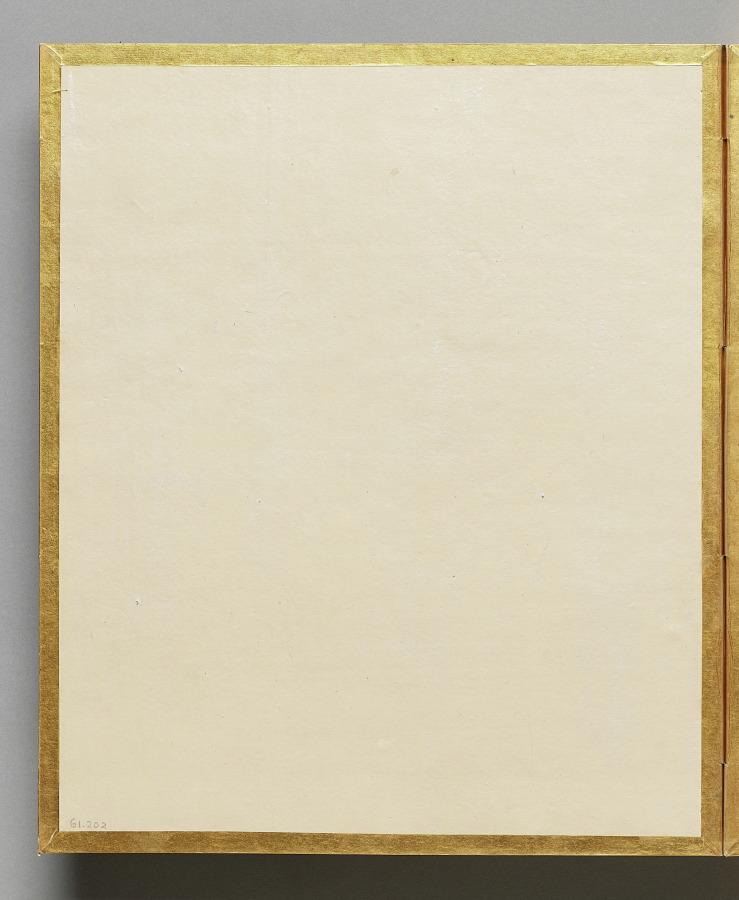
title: Album of Illustrations for the Tale of Genji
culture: Japan, Edo period (1615–1868)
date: 1600s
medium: Double-sided accordion-style album of 17 leaves; ink, light color, and gold on paper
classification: Bound Volume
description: This album contains illustrations for the classic literary work the Tale of Genji, authored in the 1000s by Murasaki Shikibu, an aristocrat of the Heian period (794–1185) court. The scenes are painted in the “white drawing” (hakubyō) mode, in which a fine ink line is used to depict figures and spaces with great subtlety, punctuated only occasionally by traces of red pigment for a character’s lips, a detail of a garment, or a decorative element. These two scenes illustrate episodes from the chapters “Thin Veil of Cloud” (Usugumo) and “Barrier Gate” (Sekiya).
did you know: The illustrations are identified by chapter title in cartouches to the upper right of the paintings.